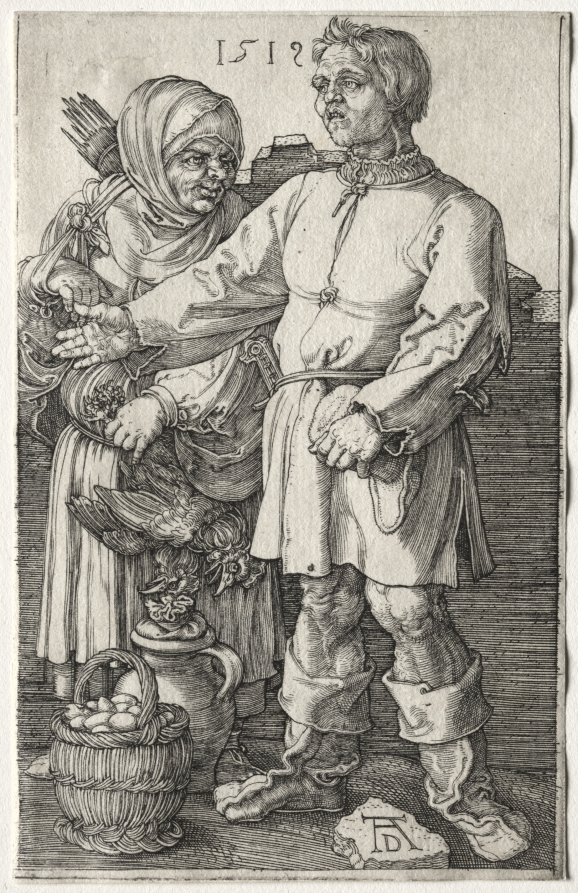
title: The Peasants at Market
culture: Germany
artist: Albrecht Dürer (German, 1471–1528)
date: 1519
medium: engraving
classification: Print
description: This quasi-market scene presents Dürer’s commentary on the social and economic role of women in the rural marketplace. In northern Europe during this period, lower class women possessed a certain amount of independence. They could move about the city buying and selling market goods to benefit the household. Here, a man peddles eggs from a large basket as the older woman listens shrewdly to his sales pitch. As indicated by the money purse at her feet, the hens in her hand, and the goods over her shoulder, it is the older woman and not the younger man who wields the position of power in this transaction.